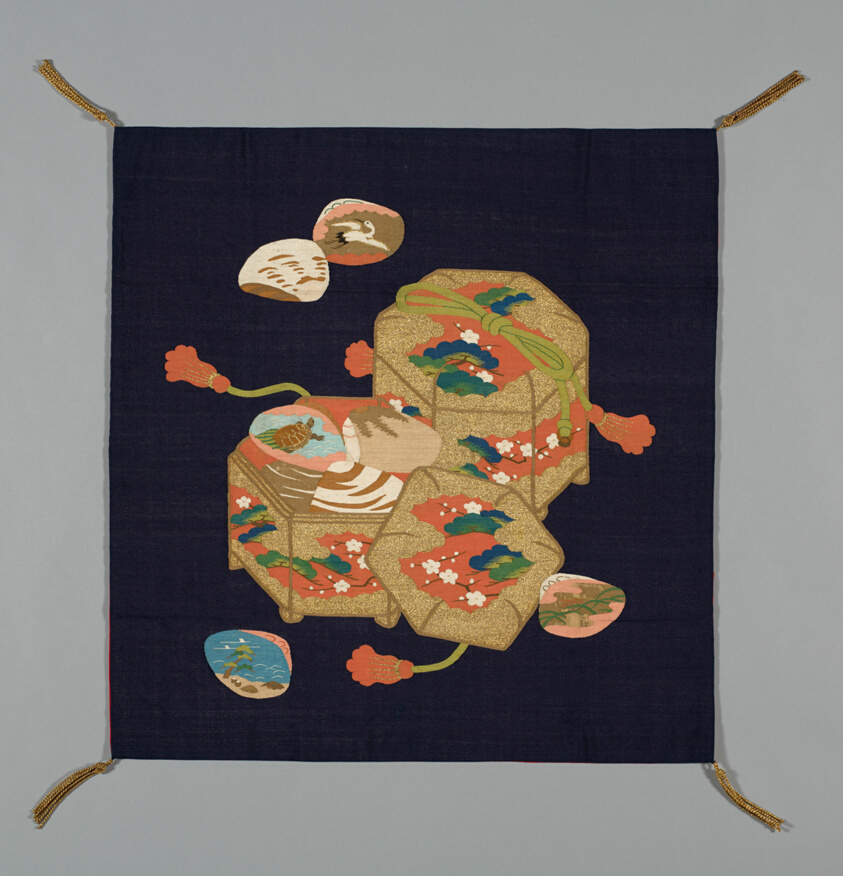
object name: Textile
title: Fukusa (Gift Cover)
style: late edo, meiji, edo (japanese period), Japanism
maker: Japan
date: late Edo period (1789–1868)/ Meiji period (1868–1912), 19th century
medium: Pattern side: silk and gold-leaf-over-lacquered-paper-strip wrapped cotton, slit and single dovetailed tapestry weaves (tsuzure); lining: silk, plain weave; sewn with front and lining matched to size (Tachikiri awase); corners: gold-leaf-over-lacquered-paper-strip wrapped cotton, knotted, re-plied fringe tassels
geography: Japan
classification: textile; weaving; printed